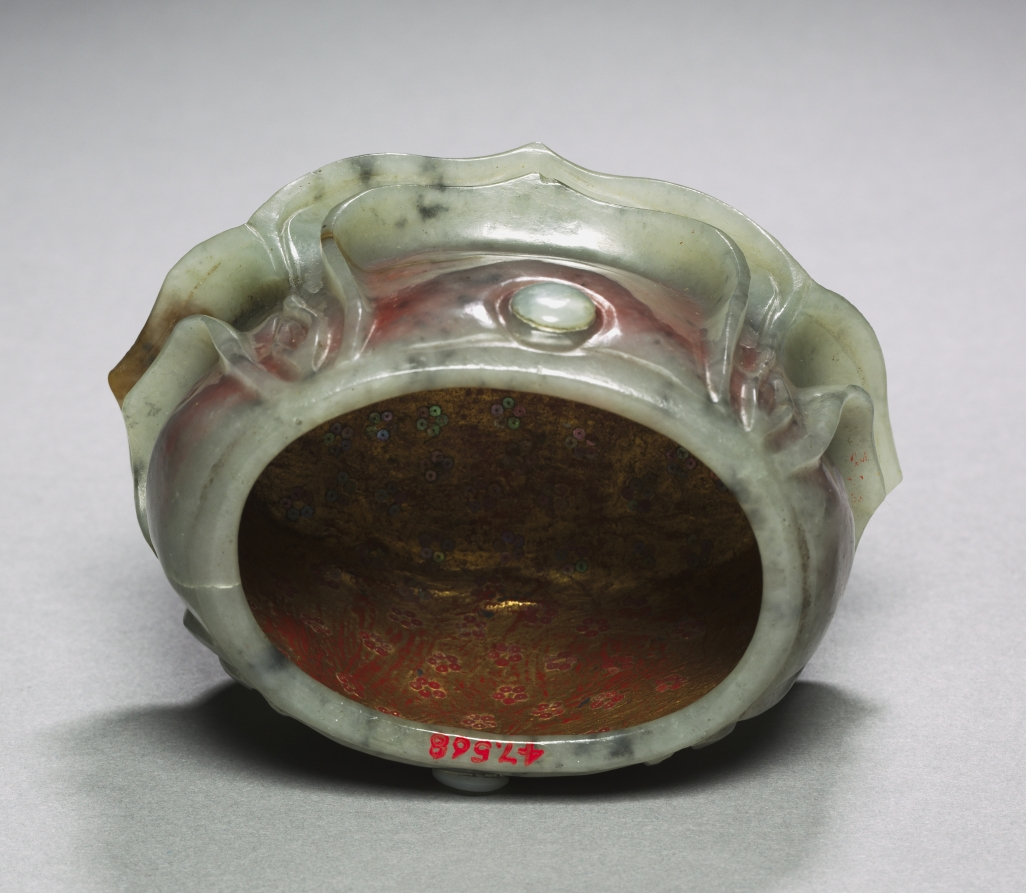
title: Daoist Cap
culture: China, Song dynasty (960-1279) - Yuan dynasty (1271-1368)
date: 960–1279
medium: grayish-green jade with brown and black markings; interior with pink pigment and gold inlays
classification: Jade